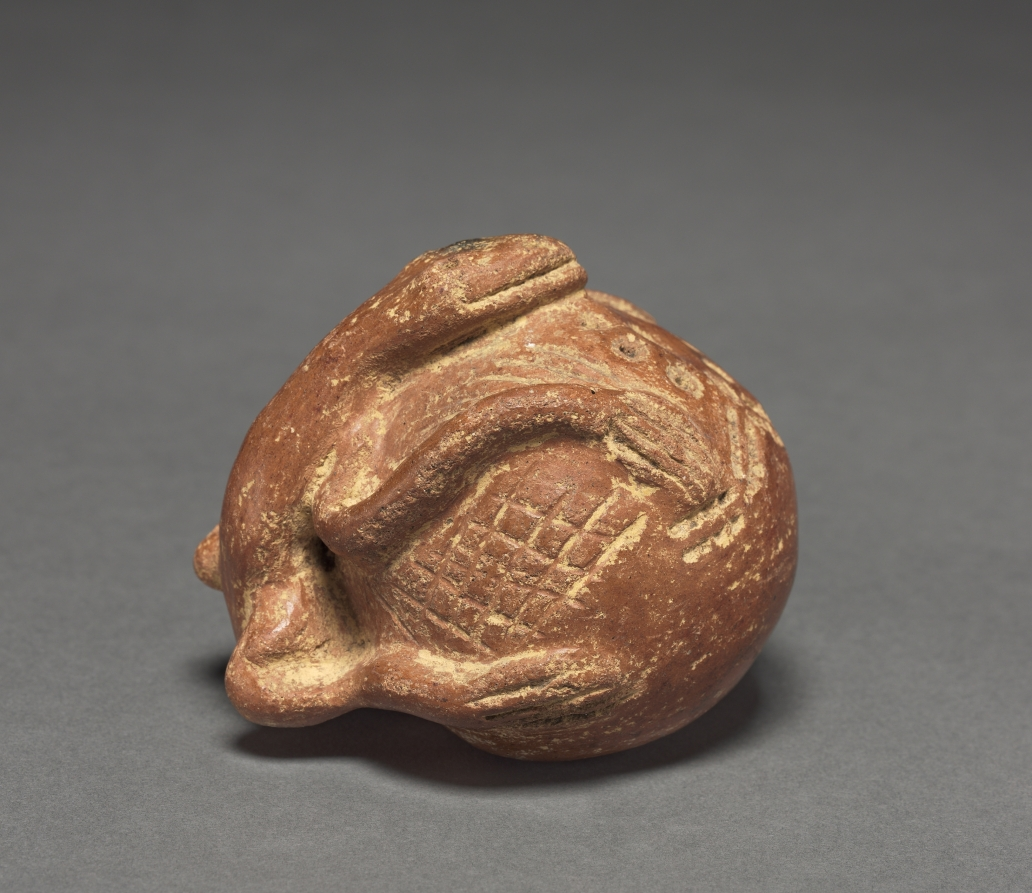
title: Chameleon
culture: Colombia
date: before 1921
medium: red ware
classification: Ceramic